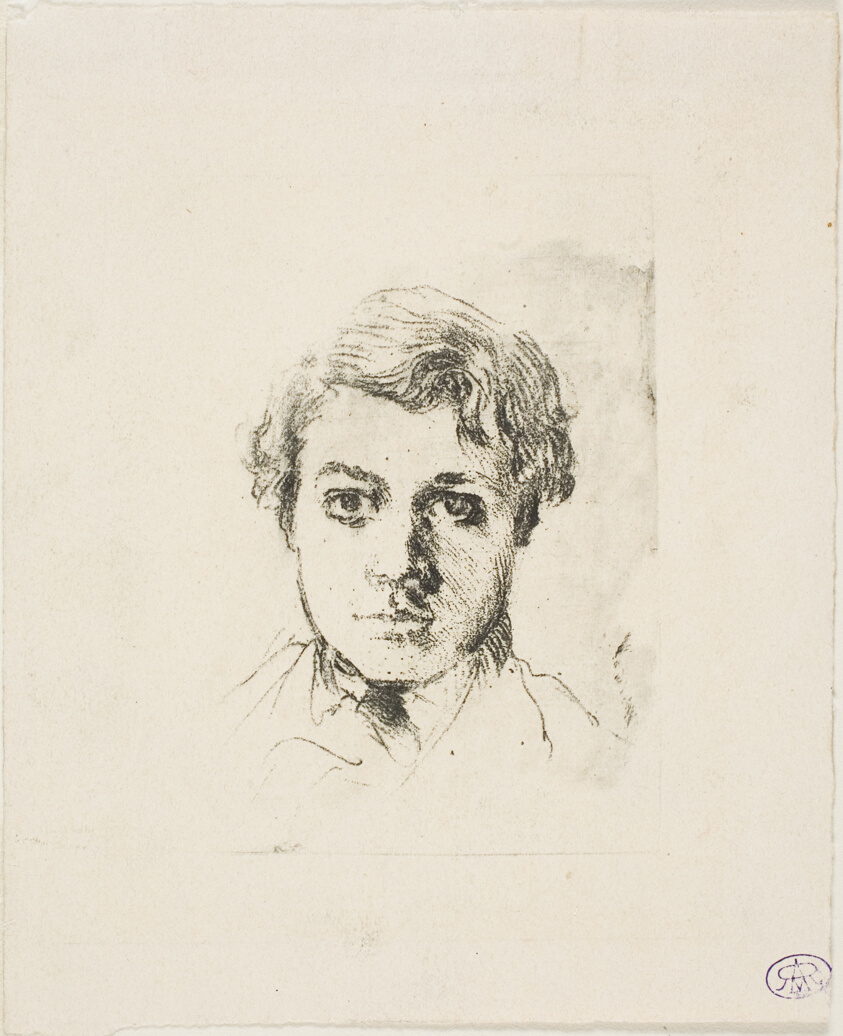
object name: Print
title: René De Gas, the Artist's Brother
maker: Edgar Degas; French, 1834-1917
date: 1861–62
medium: Soft ground etching on cream wove paper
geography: France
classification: etching; print; prints and drawing; paper